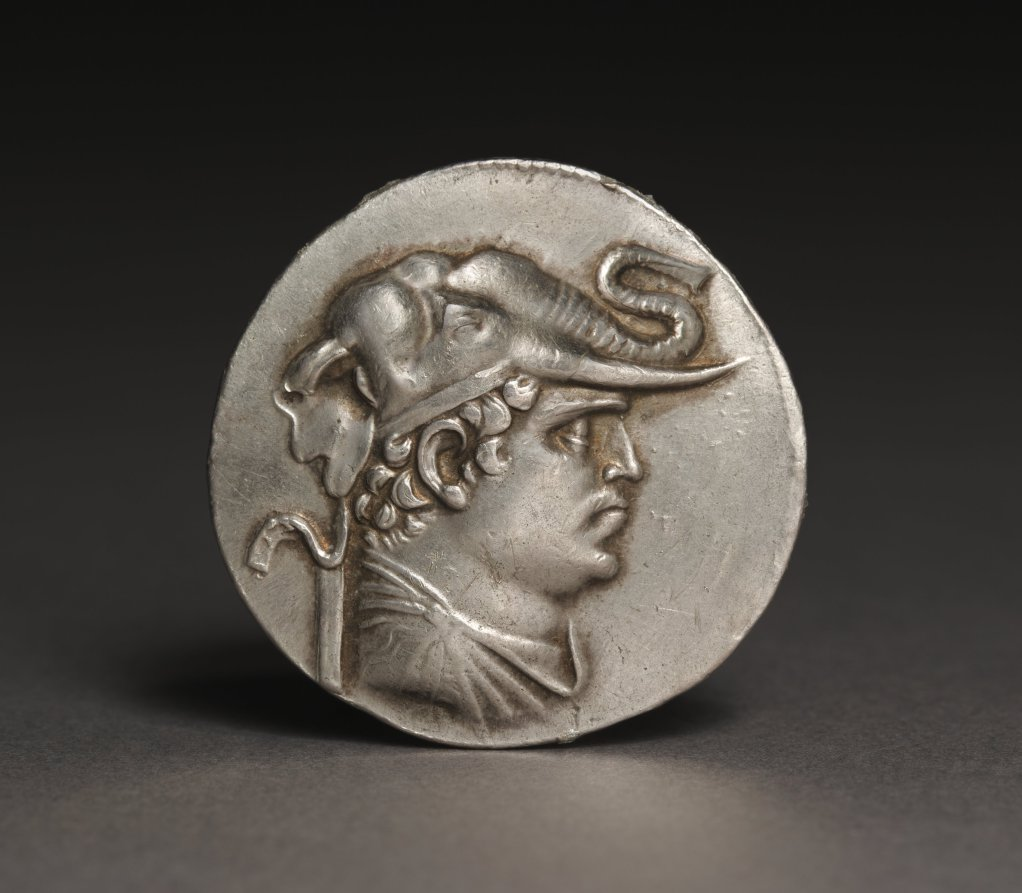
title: Coin of Demetrios, I (obverse)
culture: Afghanistan, Greco-Bactria, Demetrios I (c. 200–180 BCE)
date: 200–190 BCE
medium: silver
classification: Coins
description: Demetrios I (222–180 BC) ruled the Indo-Greek kingdom of Bactria from 200 to 180 BC and minted this coin to commemorate his conquests over territories to the south, in present-day Pakistan. He linked his image on his coin to Alexander of Macedon (356–323 BC), who depicted himself with a lion scalp after his conquest of India; Demetrios substituted an elephant for the lion. On the reverse is Hercules, also identified with Alexander.